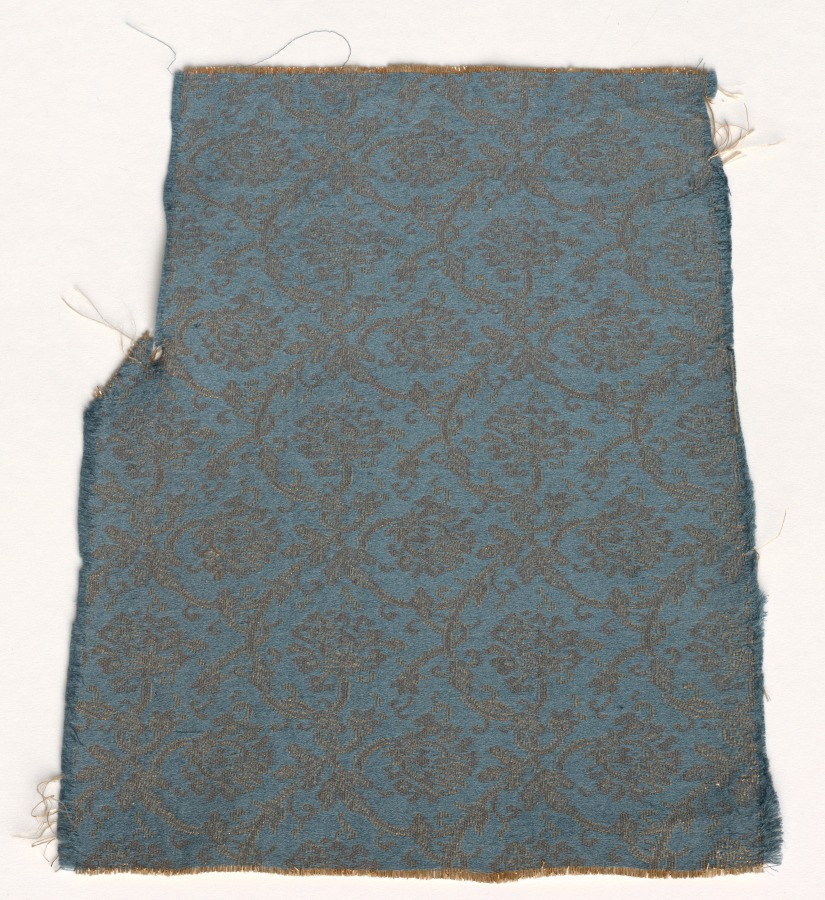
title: Textile Fragment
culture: Japan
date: 1800s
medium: silk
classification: Textile